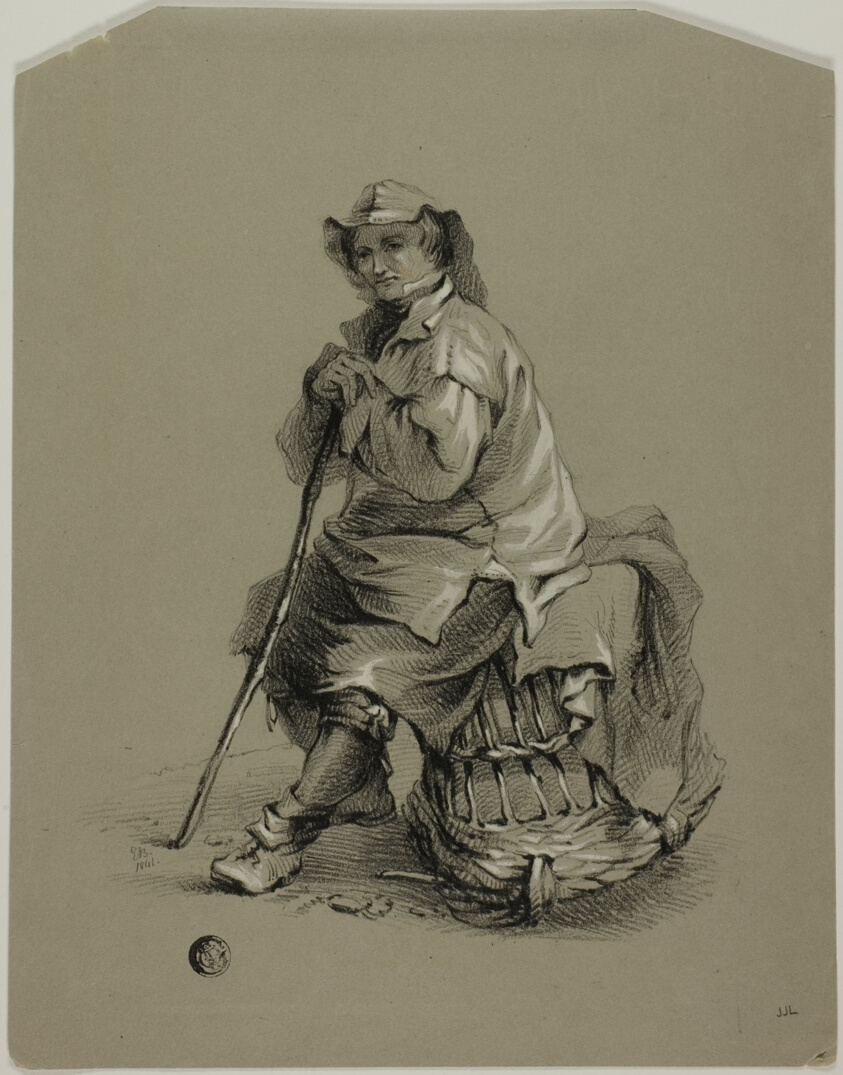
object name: Drawing and Watercolor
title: Fisherman Seated on Lobster Pot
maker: Eugène Blery (French, 1805-1887)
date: 19th century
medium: Black crayon, with traces of brush and red gouache, heightened with white gouache, on gray wove paper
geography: France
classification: crayon; drawings (visual works); prints and drawing